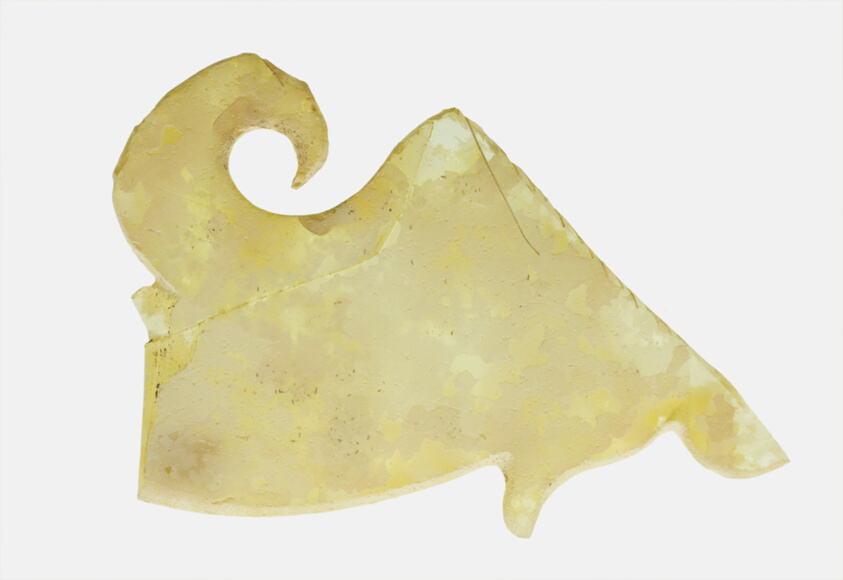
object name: Decorative Arts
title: Fragment From a Platter Handle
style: roman (ancient, style or period), ancient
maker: Roman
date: Late Roman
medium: Glass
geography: Roman Empire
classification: fragment; decorative arts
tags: dining